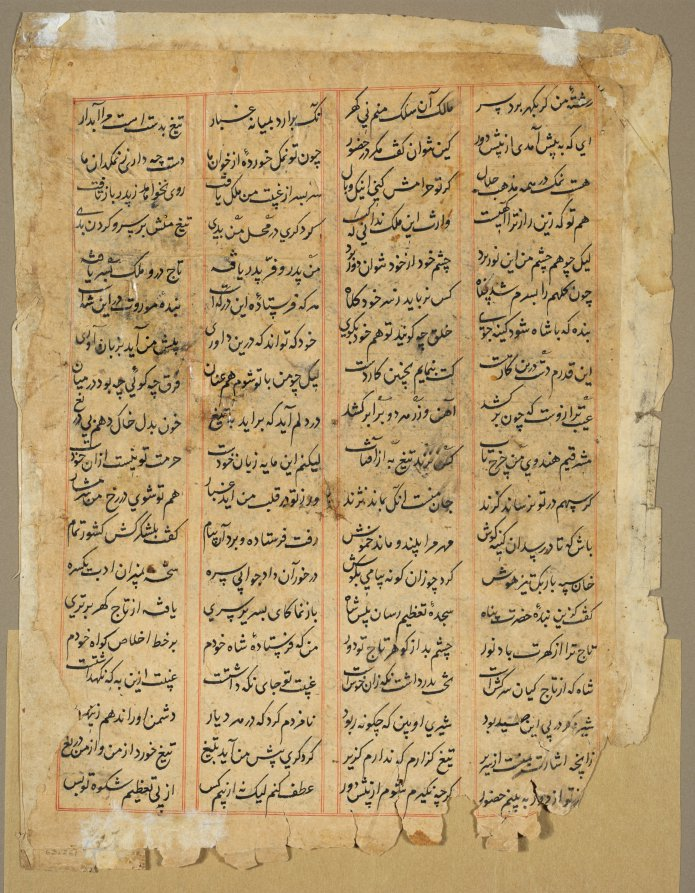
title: An East African King Receives Three Emissaries, from a Khamsa of Amir Khusrau Dihlavi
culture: India, Sultanate period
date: c. 1450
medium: gum tempera and ink on paper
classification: Painting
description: The text on this page discusses the wars between Morocco and Zang, a region of eastern Africa centered in present-day Ethiopia. In the painting the King of Zang meets three envoys. The dramatic gesture of the Zangi king, who stretches out one hand as he takes an enormous stride toward the envoys, identifies him as a powerful, assertive figure. This page is from the first known manuscript of a Persian literary text illustrated by an Indian artist, who had probably been trained in the Jain manuscript tradition. The figures are arranged on one plane in a straight line against a flat red background, typical of manuscript painting in India in the 1400s.